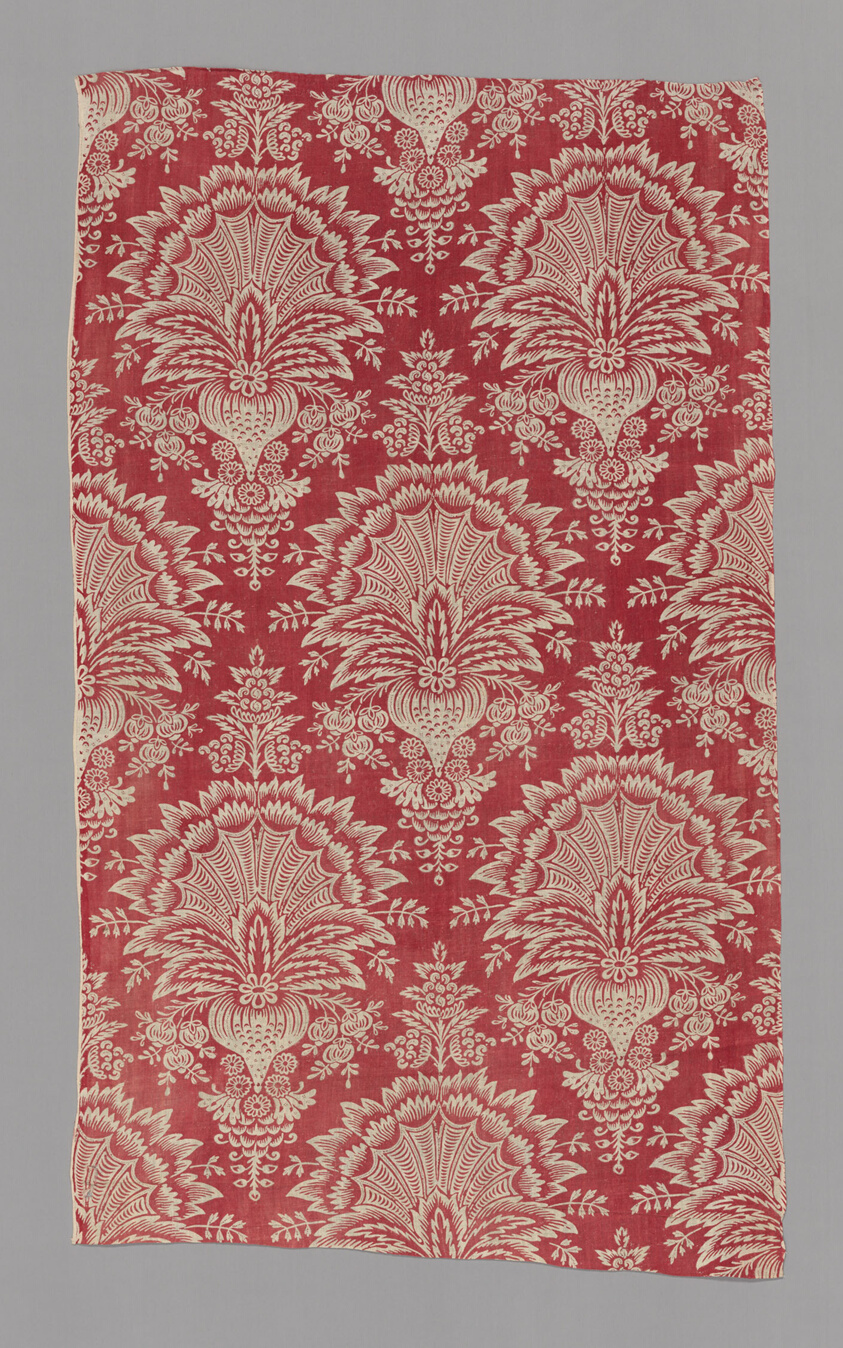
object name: Textile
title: Panel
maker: France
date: c. 1830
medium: Cotton, plain weave; block printed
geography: France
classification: textile; weaving - printed; printed textile